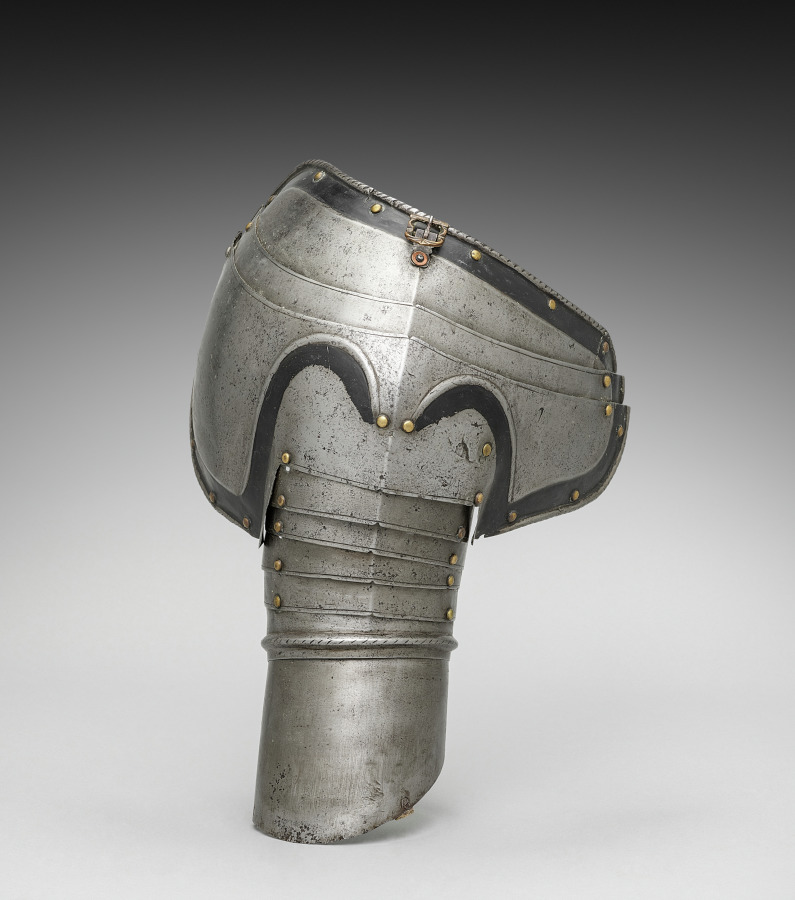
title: Right Pauldron with Rerebrace (upper cannnon)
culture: Germany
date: c.1550–1570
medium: iron, steel, leather and brass rivets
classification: Arms and Armor